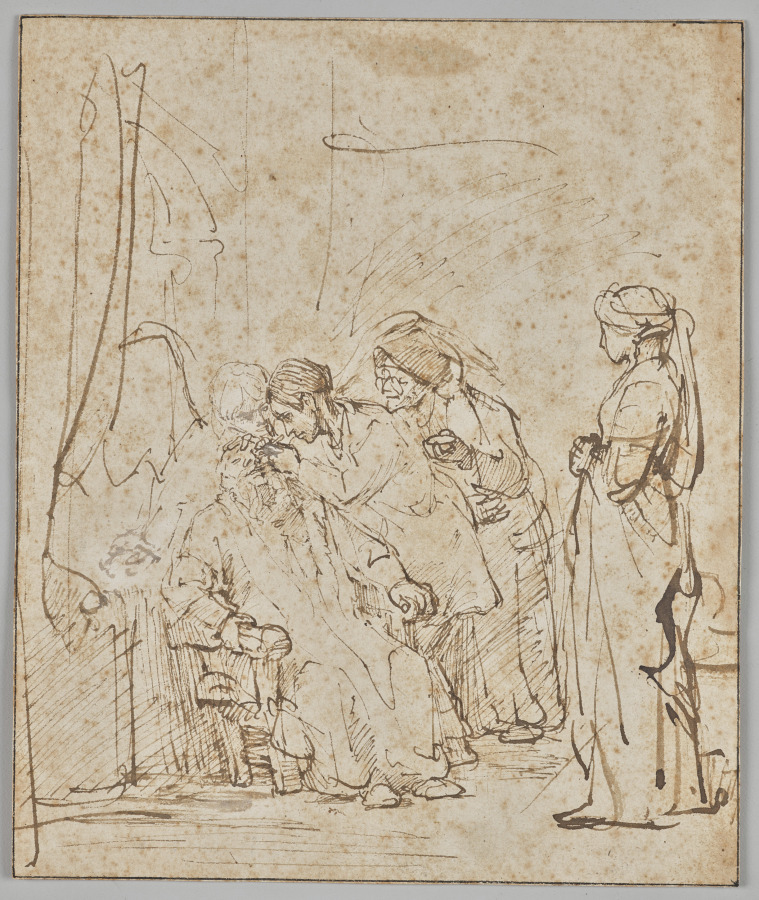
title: Tobias Healing His Father's Blindness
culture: Netherlands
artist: Rembrandt van Rijn (Dutch, 1606–1669)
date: c. 1640–45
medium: Pen and brown ink, touched with white gouache; framing lines in pen and brown ink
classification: Drawing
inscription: verso, upper center, in graphite: -13 [crossed out]; upper right, in black chalk: rembrant; upper right, in brown ink: D; upper center, in brown ink: [15-50?] / Tobias; upper left, in brown ink: 9 [sideways]; lower left, in brown ink: [illegible, cropped]; lower left, in brown ink: No 2910; lower left, in brown ink: Rembrandt; lower right, in brown ink: -d[l?]-13 [upside down]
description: This drawing is a prime example of the Dutch painter Rembrandt van Rijn's innovative approach to biblical narrative, in which he often humanized traditional pictorial formulas through the inclusion of observed details from everyday life. It depicts the climactic moment of the Book of Tobit, an apocryphal book of the Old Testament, in which, instructed by the archangel Raphael, Tobias heals his father Tobit's blindness by rubbing his eyes with fish gall. With spontaneity, a deft hand, and deceptive simplicity in his mark-making, Rembrandt depicts an intimate family scene including the archangel, Tobias, Hannah, and Sarah around a seated Tobit. Hannah’s spectacles, a unique detail among images of the scene created by Rembrandt and his circle, further thematizes sight. Rembrandt’s most innovative addition to the story centers on Tobias, who concentrates intensely to use a scalpel, rather than fish gall, to perform a cataract operation on his father’s left eye. Cataract surgery was a new procedure pioneered in Amsterdam in 1635 by Dr. Job Janszoon van Meekren, and Rembrandt may have witnessed the doctor perform it.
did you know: The seated figure in this drawing is receiving cataract surgery on his left eye, a procedure pioneered in Amsterdam in 1635 by Dr. Job Janszoon van Meekren.